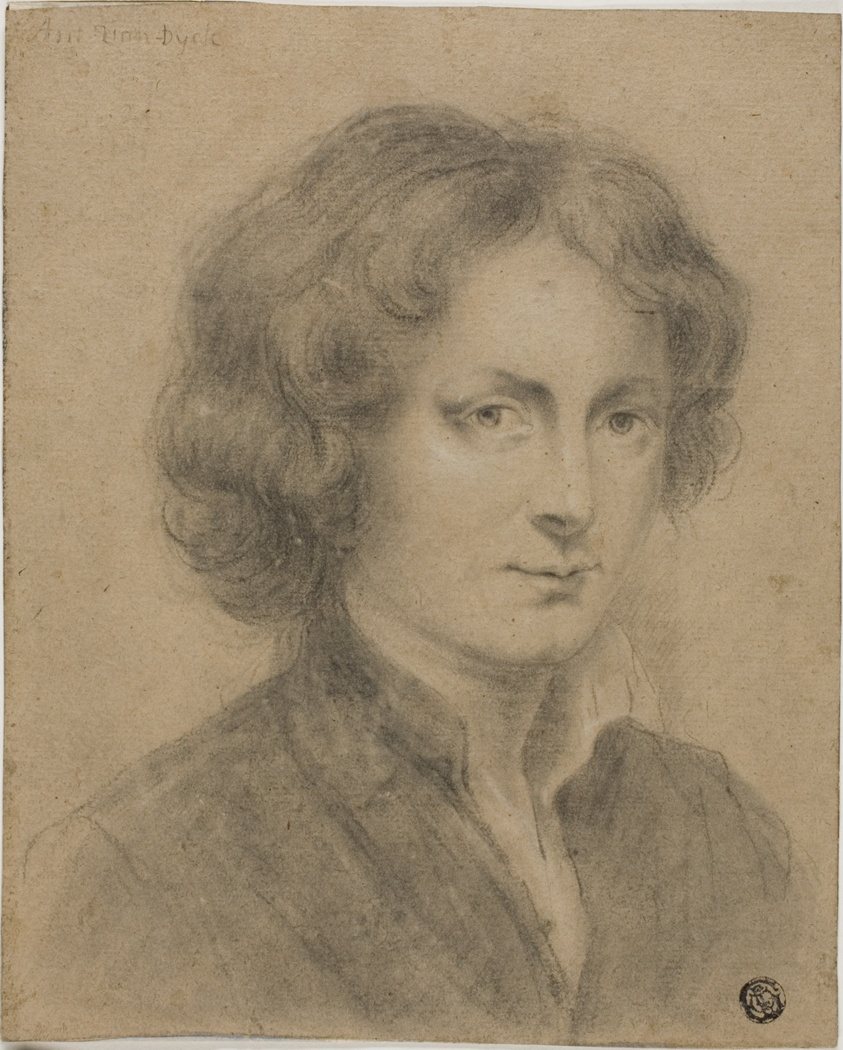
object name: Drawing and Watercolor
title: Anthony van Dyck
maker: Possibly after Anthony van Dyck; Flemish, 1599-1641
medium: Charcoal, with stumping, heightened with white chalk, on pale brown laid paper, laid down on cream laid paper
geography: Flanders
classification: charcoal; drawings (visual works); prints and drawing